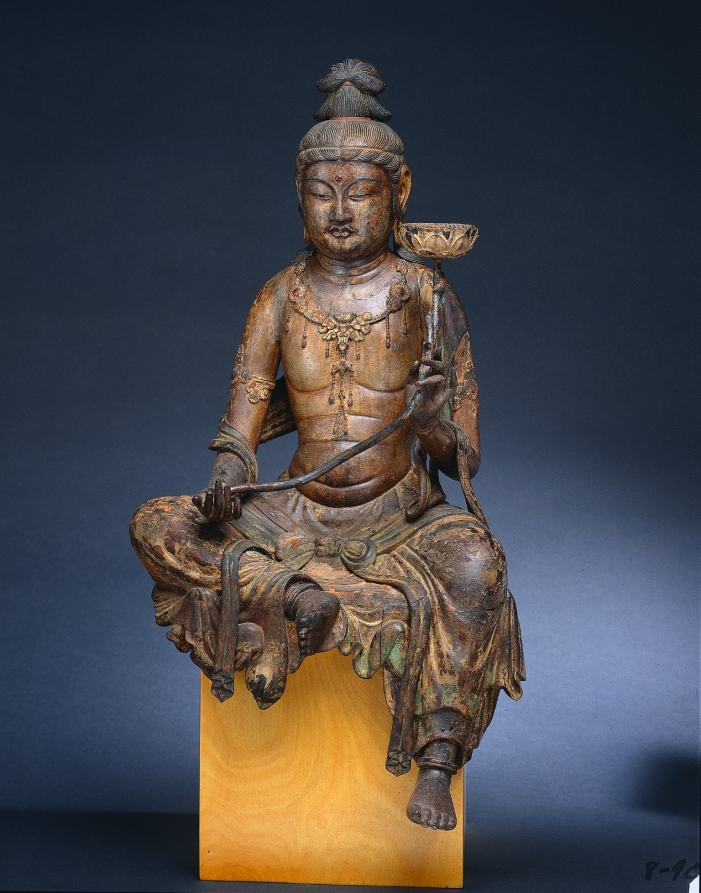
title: Bodhisattva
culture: Japan, Kamakura period (1185–1333)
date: mid-1200s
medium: wood with traces of lacquer, polychromy, and cut gold lear (kirikane)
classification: Sculpture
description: A Bosatsu (Bodhisattva in Sanskrit) is a being that has attained enlightenment but has compassionately refrained from entering nirvana in order to save others. As an attendant of Buddha, Bosatsu assumes many forms, all of which are worshipped as deities in Japanese Buddhism.